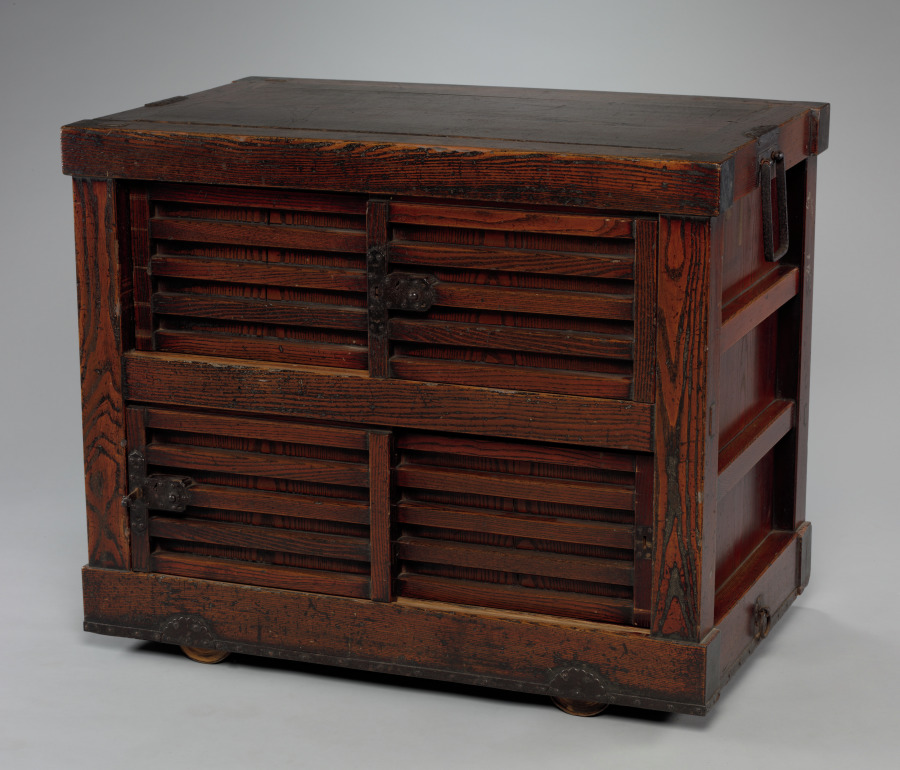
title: Chest on Wheels (Kurumadansu)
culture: Japan, Edo period (1615–1868)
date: 1715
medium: wood with iron fittings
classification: Furniture and woodwork